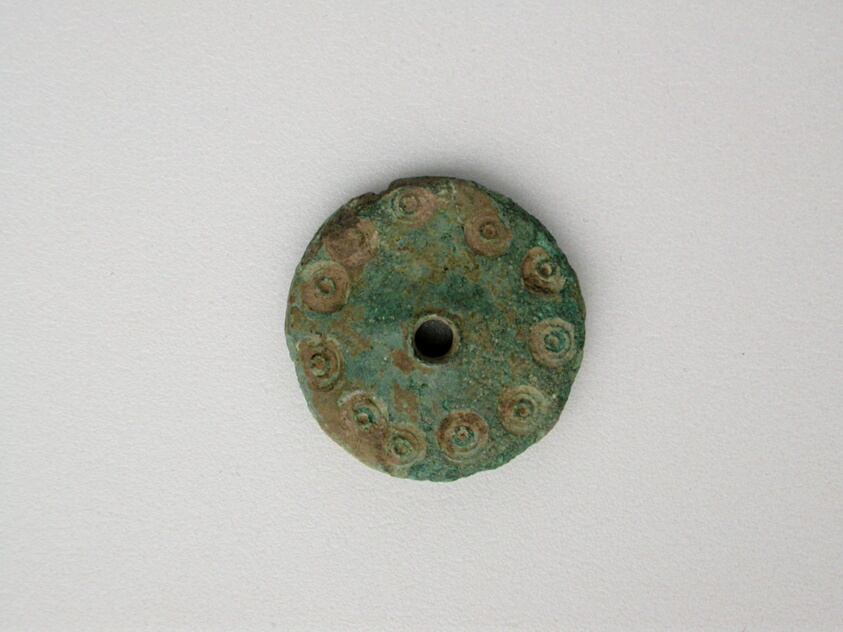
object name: Decorative Arts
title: Disc, Chariot Wheel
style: geometric, ancient, greek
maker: Greek; Thessaly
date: Geometric Period (800–700 BCE)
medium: Bronze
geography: Thessalía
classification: votive offering; ex-voto; decorative arts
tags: wheel